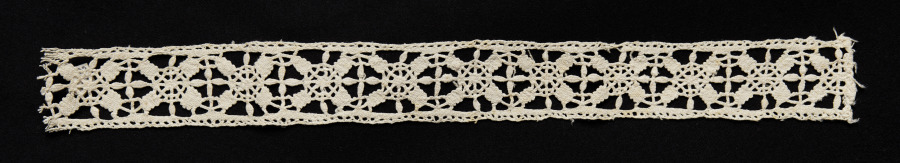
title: Lace Insertion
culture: Italy, Genoa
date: 1550–99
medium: Bobbin lace (needle lace, reticella design)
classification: Lace